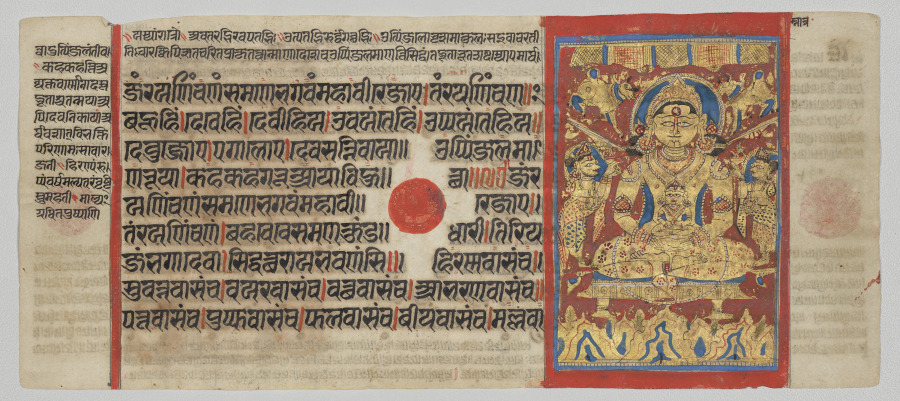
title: Ritual Bath of Mahavira, Folio 31 (recto), from a Kalpa-sutra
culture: Western India, Gujarat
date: c. 1475–1500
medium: Gum tempera, ink, and gold on paper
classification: Painting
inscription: [[upper right]] snātra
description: The large, seated figure in the center of the composition is Indra, king of the gods, who holds in his lap the infant Mahavira, founder of the Jain religion. Indra had taken him to Mount Meru, indicated by the jagged peaks at the bottom of the painting, for his first bath. Two priests flanking them hold vessels for the bath, and the two cows above indicate that the vessels are full of milk. The milk bath washed away all the impurities of the birth.